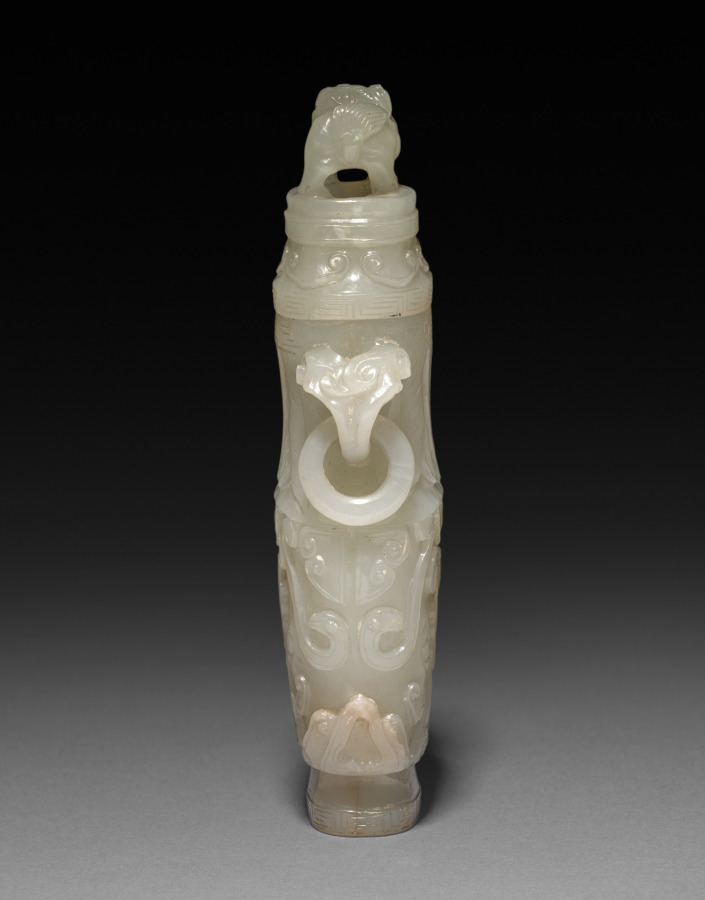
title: Jar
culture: China, Qing dynasty (1644-1911)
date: 1644–1911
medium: jade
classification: Jade